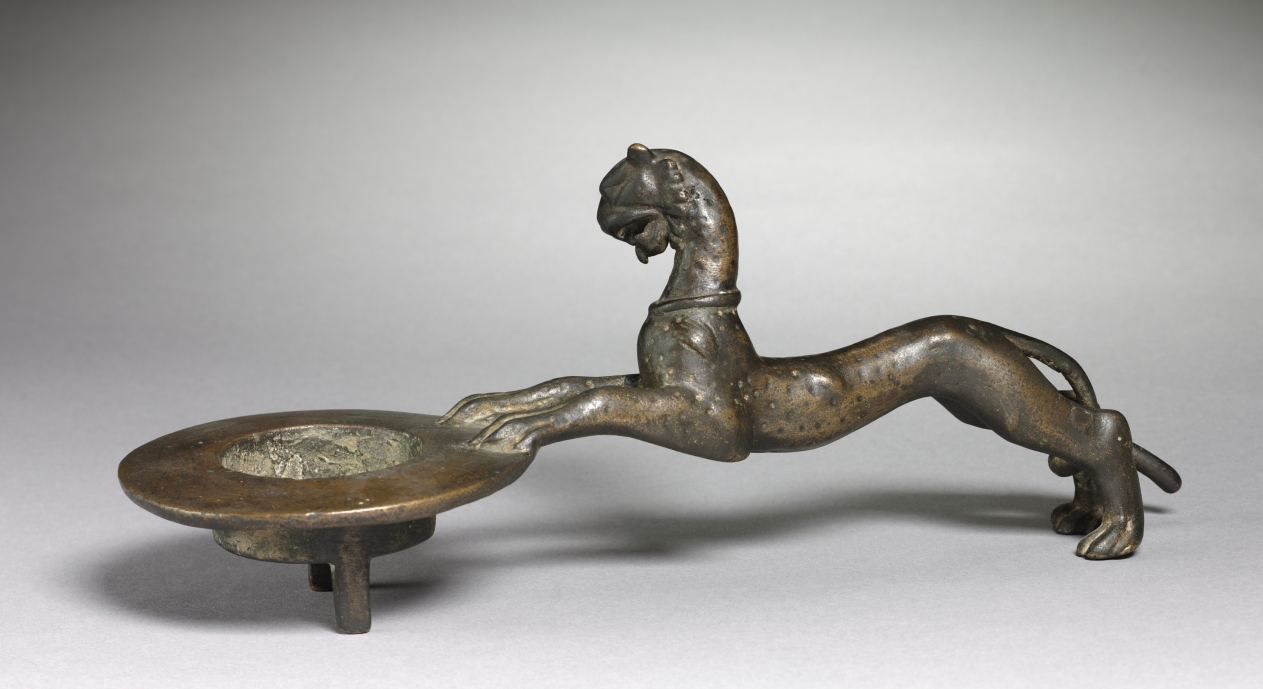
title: Feline-Handled Incense Burner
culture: Burudjird(?), Parthian Empire (247 BCE–224 CE)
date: c. 100 CE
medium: bronze, cast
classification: Metalwork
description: The Parthians were a world power rivaling the Romans from 100 BC until about AD 200. They were succeeded in Iran by the Sasanians.